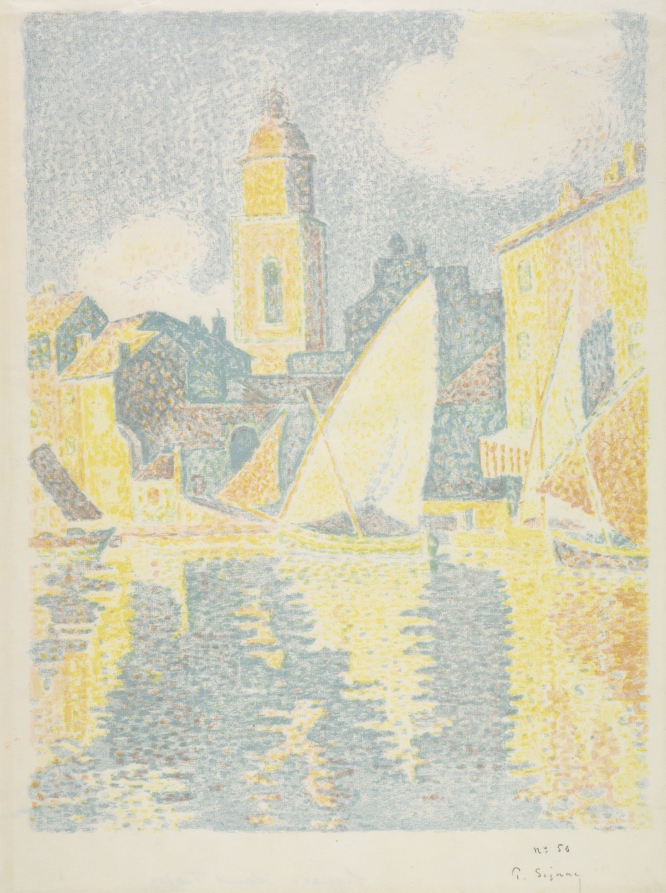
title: Saint-Tropez: The Port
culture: France, 20th century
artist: Paul Signac (French, 1863–1935)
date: 1897–98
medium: color lithograph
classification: Print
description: Signac adapted for the lithographic process the style he and George Seurat (1859-1891) developed in the 1880s for painting: pointillism. Brilliantly colored dots were juxtaposed to produce a full optical tonal range more luminous than can be obtained from pigments mixed on the palette. Saint-Tropez, printed in six colors (blue, blue-gray, red, pink, yellow, and green), demonstrates that lithography was a perfect vehicle for translating these artists' scientific ideas about color.